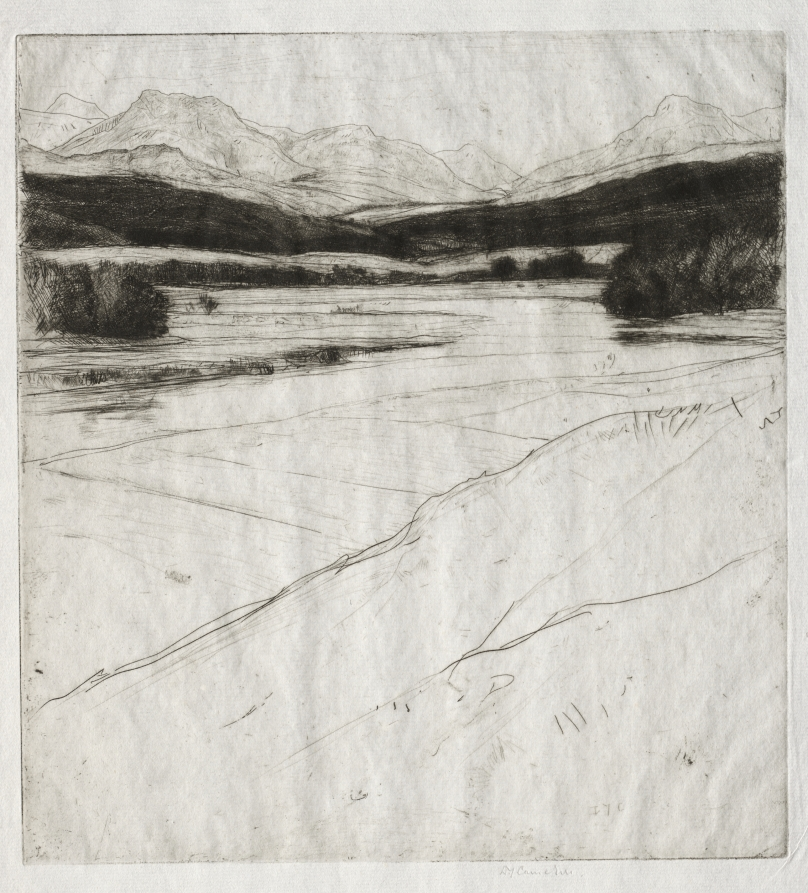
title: Hills of Tulloch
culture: England, 20th century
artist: David Young Cameron (British, 1865–1945)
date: 1915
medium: etching and drypoint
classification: Print